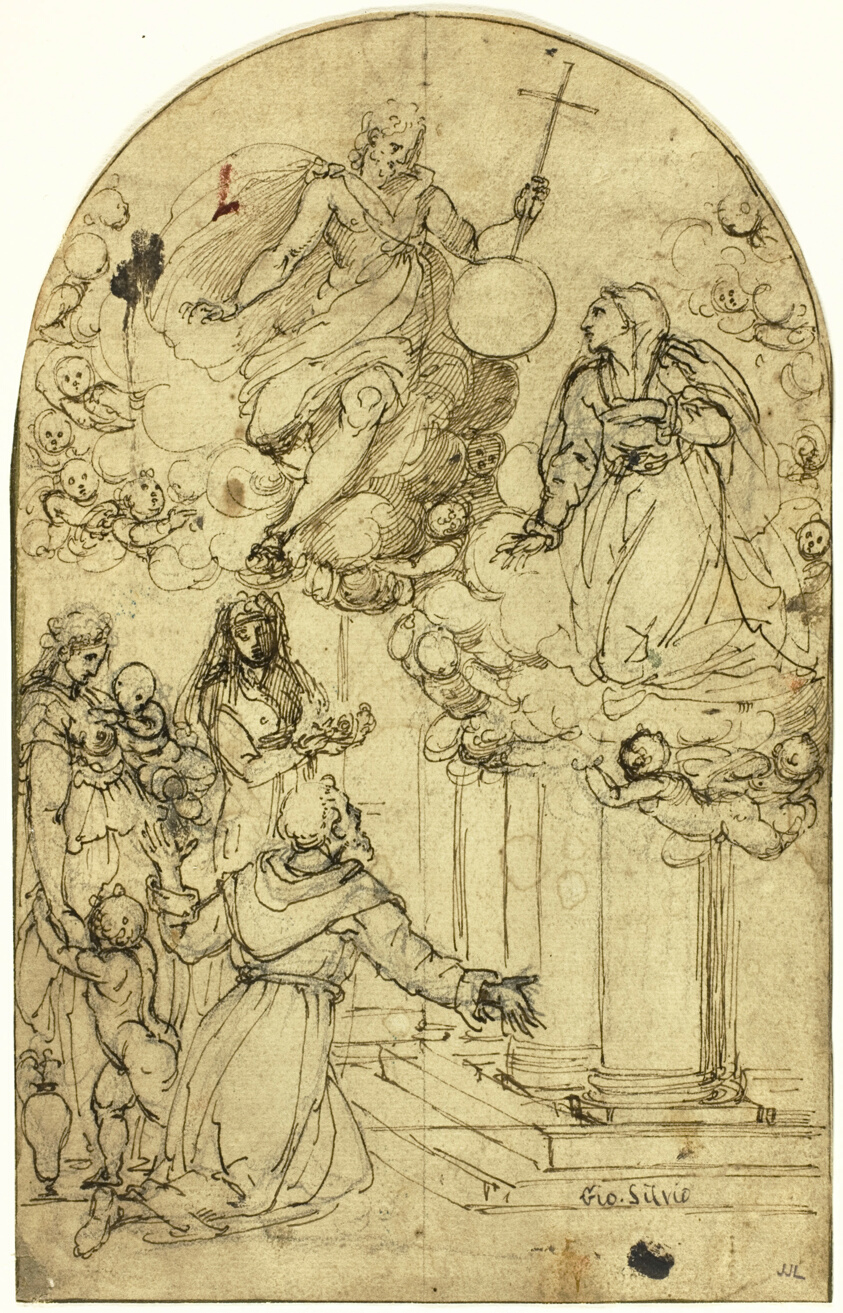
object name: Drawing and Watercolor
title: Vision of Saint Francis of Assisi at the Portiuncula (recto); Ornamental Design (verso)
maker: Circle of Alessandro Allori (Italian, 1535-1607)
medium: Pen and brown ink over black chalk (recto), and pen and brown ink with brush and brown and gray wash (verso) on lunette-shaped ivory laid paper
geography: Florence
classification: pen and ink drawings; drawings (visual works); prints and drawing